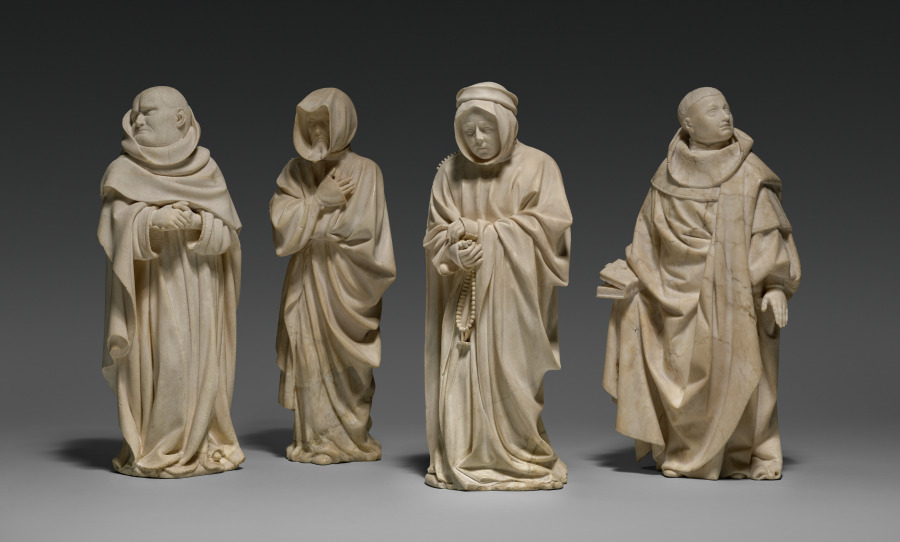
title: Mourner from the Tomb of Philip the Bold, Duke of Burgundy (1364–1404)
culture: Netherlands, active Dijon, 15th century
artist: Claus de Werve (Netherlandish, 1380–1439)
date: 1404–10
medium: vizille alabaster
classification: Sculpture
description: This figure comes from the tomb of Duke Philip the Bold from the church of Champmol near Dijon (Burgundy, France). Philip, who founded the monastery and designated it as his burial place, hired the best artists, many of whom came from the Netherlands. While the commission was given in 1381, the work was not completed until 1410, six years after the duke’s death. This mourner is unusual for the time because it is not carved as a static low relief on the pedestal of the tomb but interacts with the viewers and their fellow procession members. The lifelike quality of the figure is due in large part to the alabaster. Its softness allowed artists to carve details into the material, and the transparent, milky white stone could also be polished to a high gloss.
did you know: A plaster cast of this mourner decorates the empty niche in the Tomb of Philip the Bold in Dijon, France.